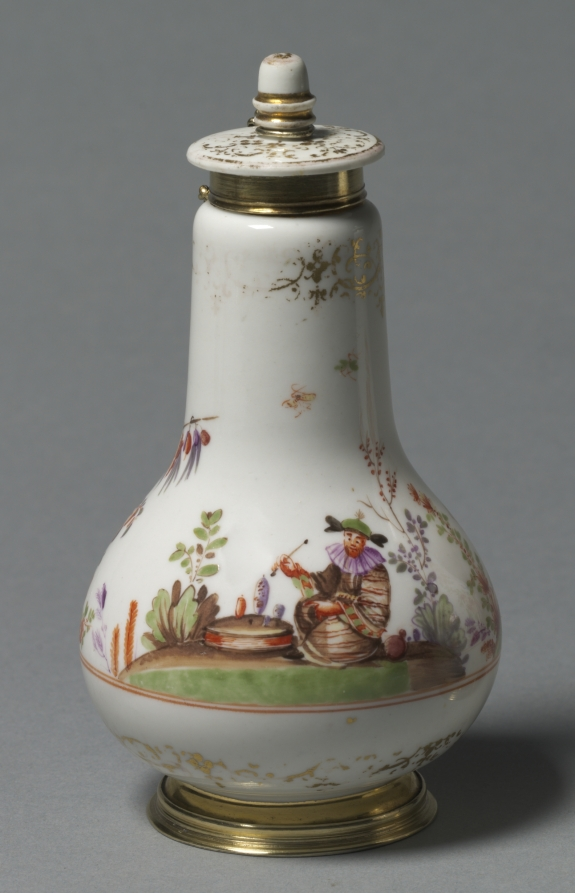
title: Covered Flask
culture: Germany, Meissen, 18th century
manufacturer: Meissen Porcelain Factory (German, est. c. 1710)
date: c. 1720–1723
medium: porcelain with gilt metal mounts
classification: Ceramic